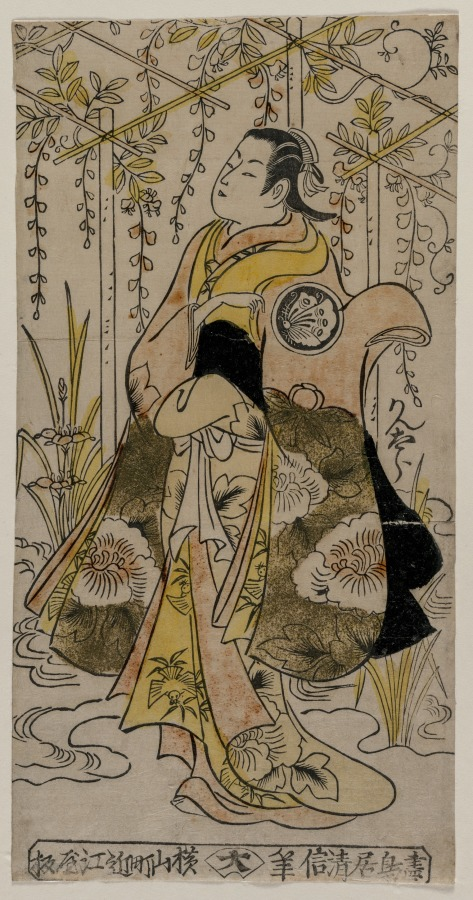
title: Sanjo Kantaro as a Young Woman Standing in a Wisteria Arbor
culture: Japan, Edo period (1615–1868)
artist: Torii Kiyonobu I (Japanese, 1664–1729)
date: c. early or mid 1730s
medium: color woodblock print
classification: Print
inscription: Signature: Gako Torii Kiyonobu hitsu Publisher: Omiya (Yokoyamacho Omiya han, emblem)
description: This rare, hand-colored print incorporates a technique called urushi-e, literally "lacquer picture," in which the artist paints deer glue over areas of black pigment, producing a lustrous effect reminiscent of lacquer. Metal filings were sometimes sprinkled onto the pigment for decorative effect. Kiyonobu’s prints are characteristically hand-colored and outlined in black. Inspired by a family tradition of painters of Kabuki posters, Kiyonobu created prints mainly of actors and scenes from plays.